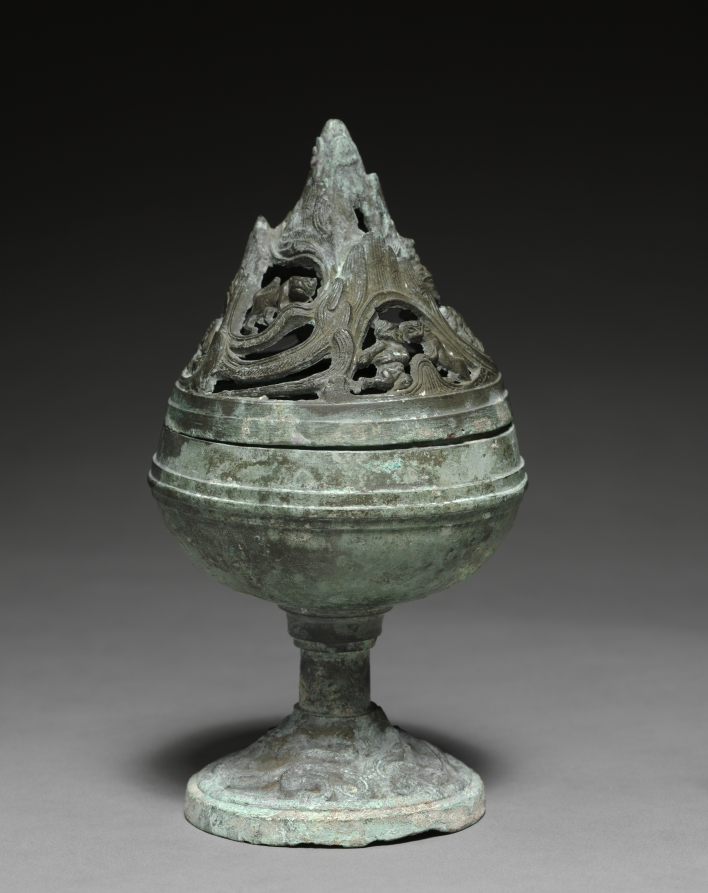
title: Incense Burner (Boshan Lu)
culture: China, Western Han dynasty (206 BCE–8 CE)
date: 200–100 BCE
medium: bronze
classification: Metalwork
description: The conical cover of this incense burner represents a miniature mountain with hunting scenes. The cover was shrouded in mist and emanated intoxicating smoke through its openwork when fragrant woods and herbs were burnt in its stem cup, transporting its beholder into an imaginative realm.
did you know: Deities (appearing as hunters) and fantastic beasts roam freely among mists and clouds on this incense burner.